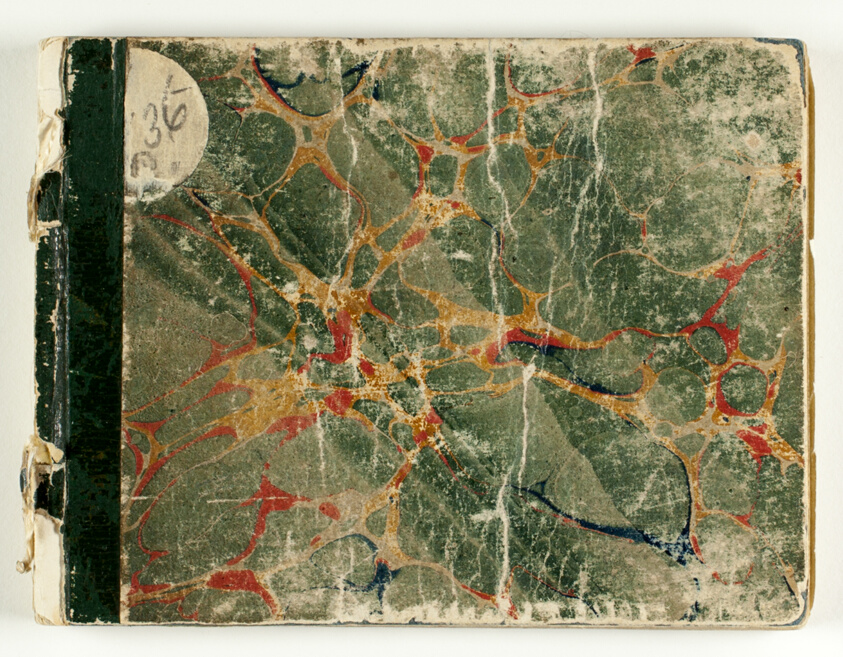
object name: Book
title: Persons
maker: Charles George Lewis (English, 1808-1880)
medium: Sketchbook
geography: England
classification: sketchbook; graphite; prints and drawing; book